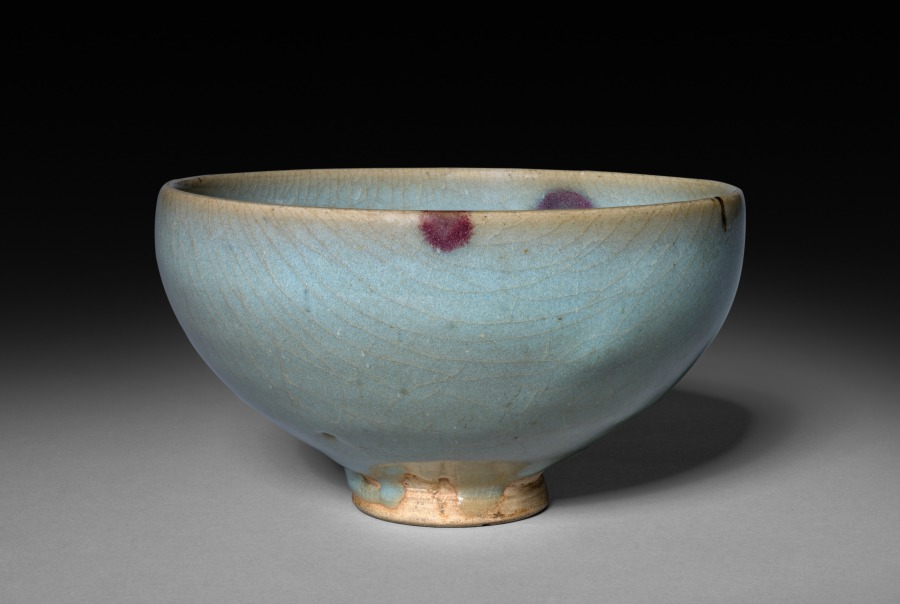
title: Bowl: Jun ware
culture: Northern China, Jin dynasty (1115-1234) - Yuan dynasty (1271-1368)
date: Jin dynasty (1115–1234) - Yuan dynasty (1271–1368)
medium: glazed buff stoneware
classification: Ceramic